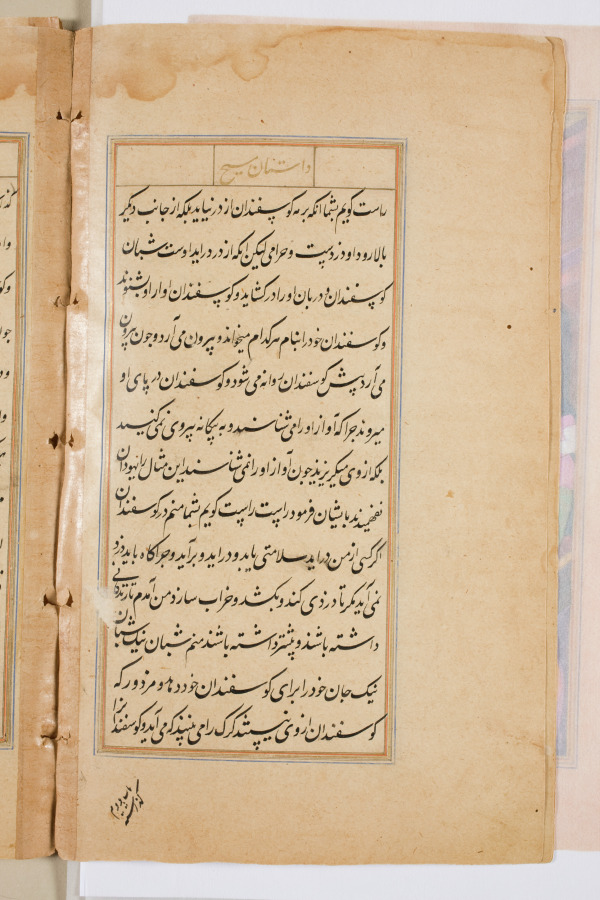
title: Text page from a Mirror of Holiness (Mir’at al-quds) of Father Jerome Xavier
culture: Mughal India, Allahabad, made for Prince Salim (1569–1627)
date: 1602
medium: Ink and gold on paper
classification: Manuscript